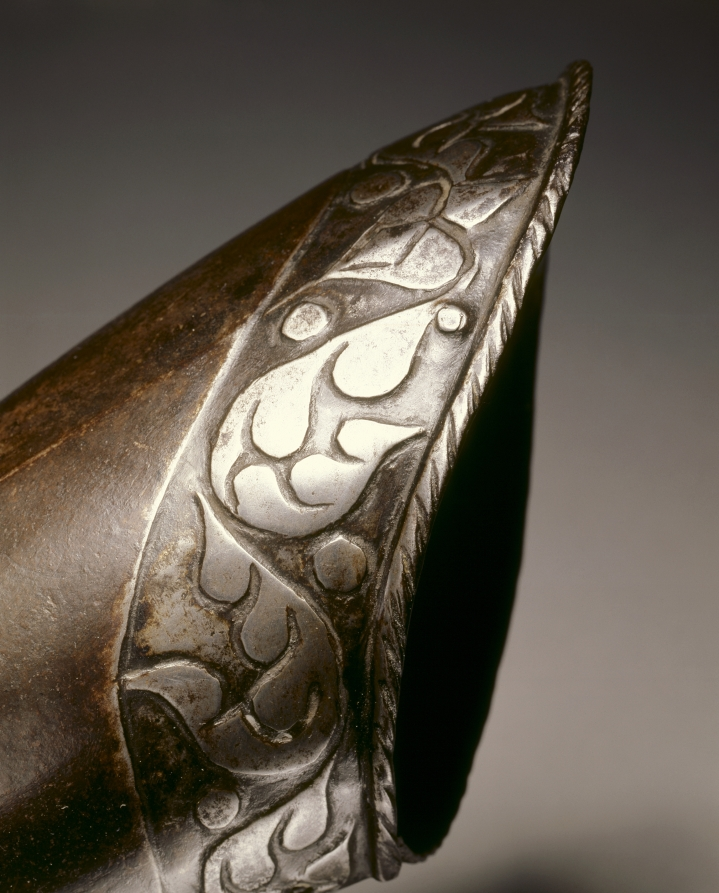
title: Black and White Elbow Gauntlet for the Right Hand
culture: North Germany, 16th century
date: c.1570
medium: steel, blackened with leather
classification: Arms and Armor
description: Plate armor alternately decorated with brightly polished ("white") and darkened ("black") surface areas is commonly referred to as "black and white" armor. The black color results from painting the surface areas, or merely leaving them dark from the forging process. The gauntlet here has been further embellished with an embossed cuff. The 1500s saw the revival of this ancient technique also known as repoussé. First the pattern is drawn onto the surface and then hammered and punched from the inside to gradually shape the desired raised design on the outer surface of the metal. This technique was reserved for only the costliest of armors.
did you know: To throw a gauntlet or armored glove at the feet of your enemy or opponent was a grave insult, one only to be matched with personal combat. This is where we get the modern phrase "throw down the gauntlet."